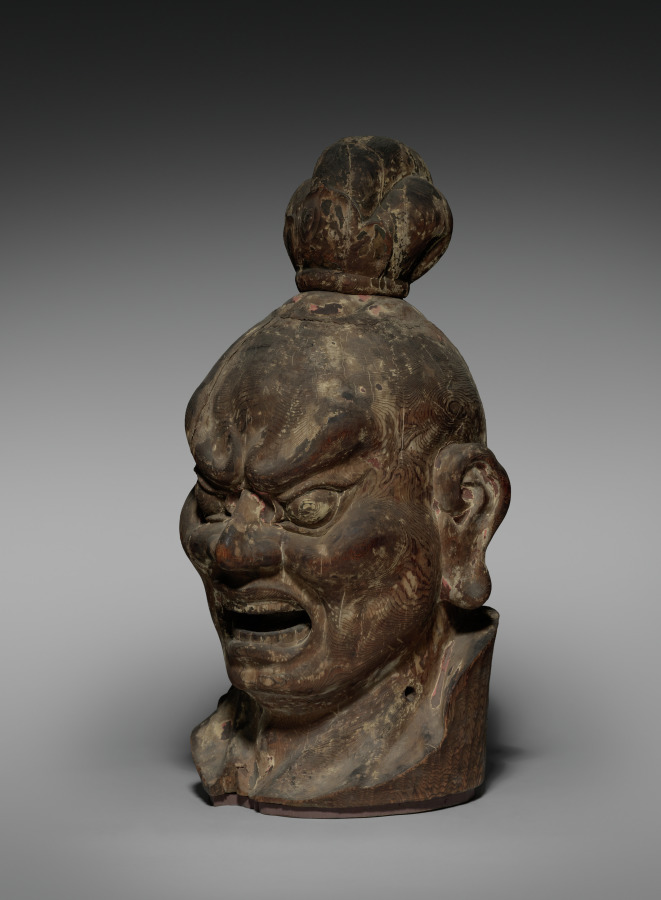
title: Head of Ni-o with Open Mouth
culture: Japan, Kamakura period (1185–1333)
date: 1200s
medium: wood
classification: Sculpture